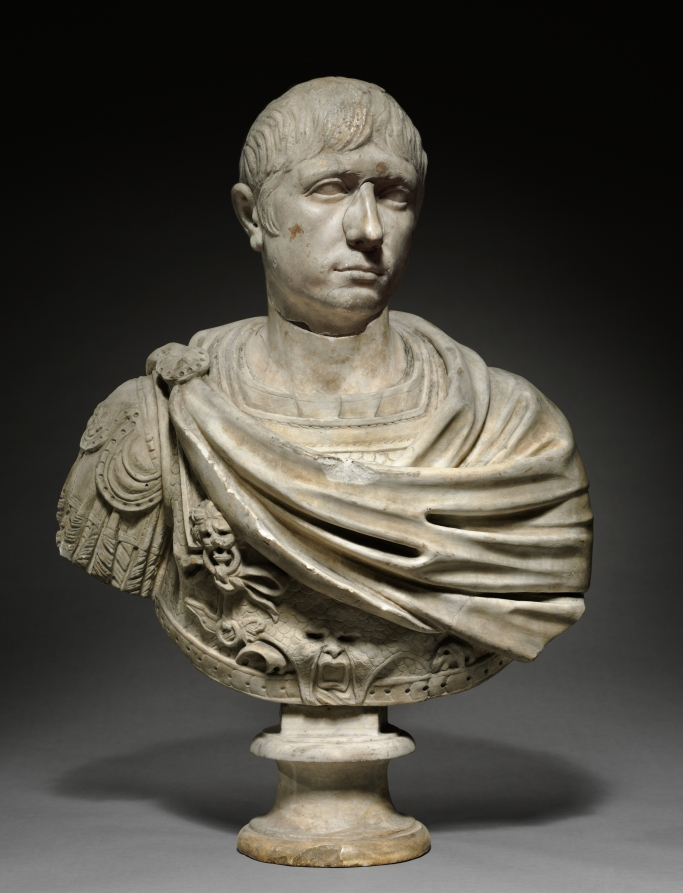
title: Bust of a Man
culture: Italy, Face: Roman, early 2nd century or later; Body: 16th century or later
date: Face: early 2nd century or later. Body: 1500s or later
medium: marble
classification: Sculpture